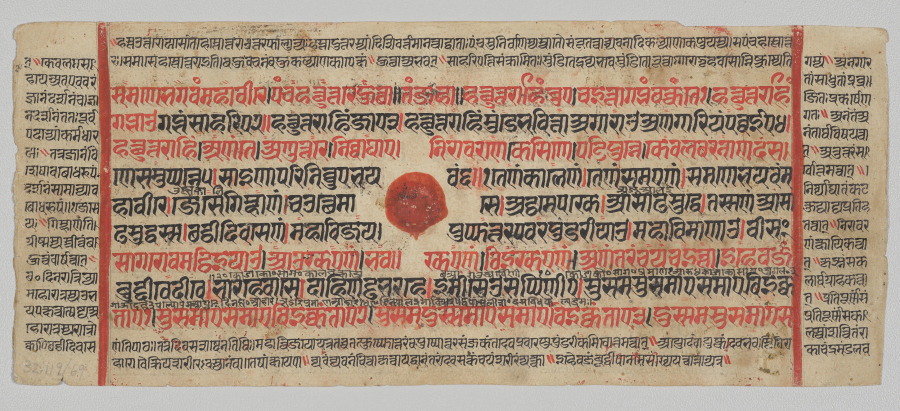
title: Text, Folio 2 (recto), from a Kalpa-sutra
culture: Western India, Gujarat, last quarter of the 15th century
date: c. 1475–1500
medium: Gum tempera, ink, and gold on paper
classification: Painting